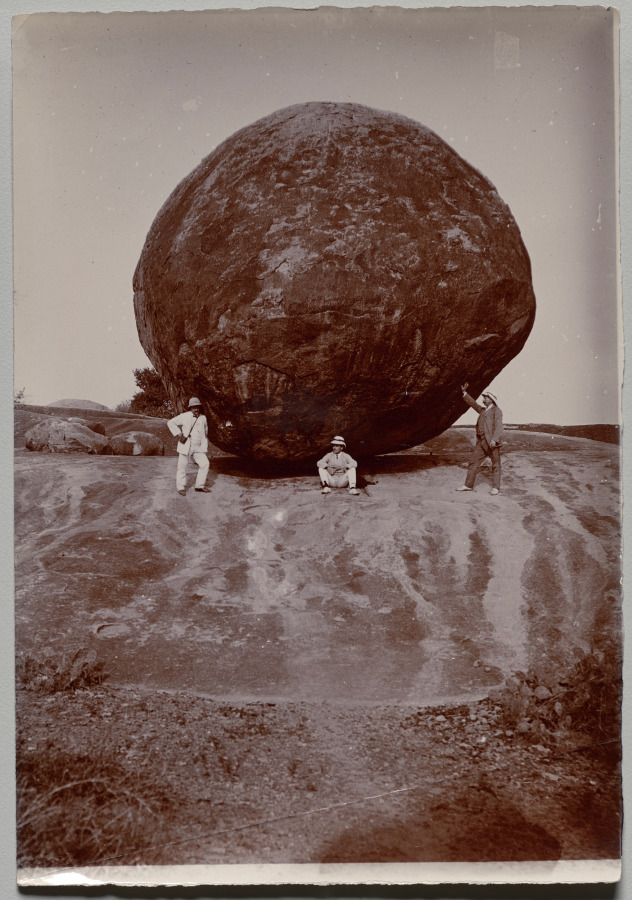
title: Krishna's Butter Ball, Mahabalipuram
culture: early 20th century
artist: Unidentified Photographer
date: c. 1900s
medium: Gelatin silver print, toned, on collodion printing-out paper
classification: Photograph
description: Mahabalipuram is a site on India’s southeastern coast where numerous rock-cut temples and sculptures were carved during the early 600s. The site includes a remarkable, naturally occurring boulder that became known popularly as Krishna’s Butter Ball, thereby merging a geological phenomenon with sacred narrative. If baby Krishna could crawl while holding this monolith as effortlessly in his hand as a ball of butter, he must be a magnificently powerful god. Colonial-era tourists enjoy their excursion to the site with no indication that they recognized its sanctity. Photographs such as this would have been sent back to Britain for viewers to marvel at the landscape of India.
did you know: It was popular during the early 1900s to tone silver gelatin photographs with gold to give them a warm glow.